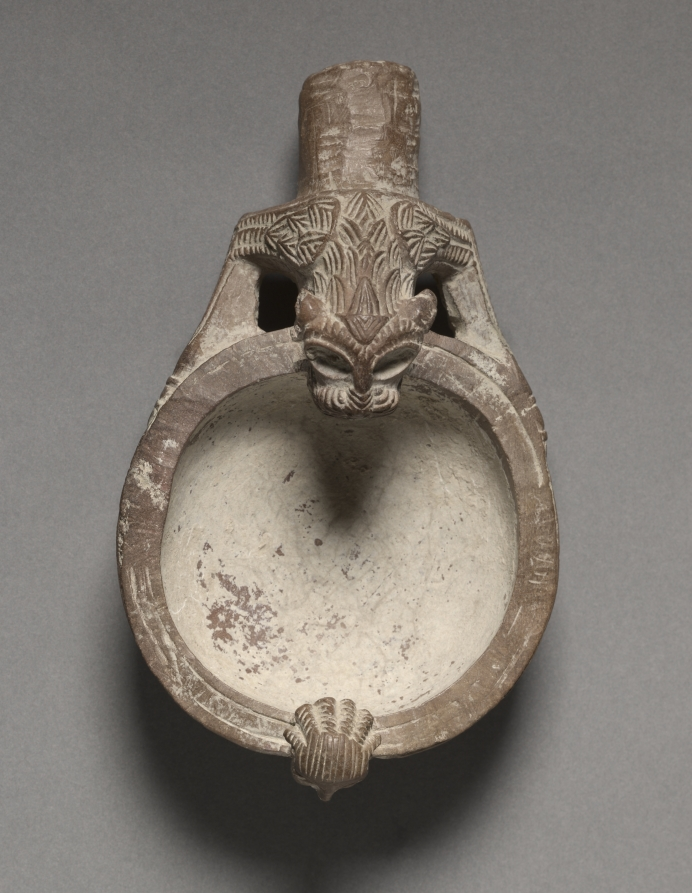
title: Libation Dish-Jar Stopper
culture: Syria, Hittite (?) or Middle Iron Age, Tell Ahmar, Djezizeh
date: 1600–700 BCE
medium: stone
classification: Sculpture